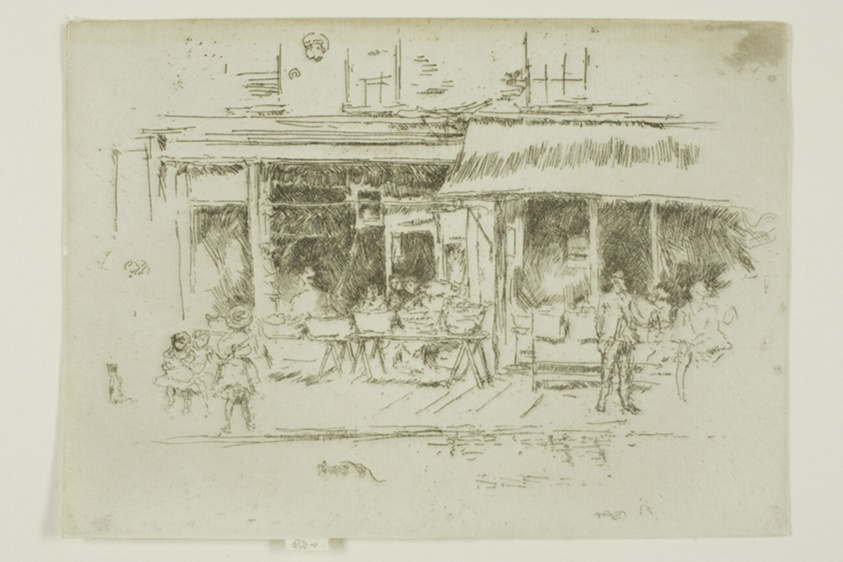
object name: Print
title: Nut Shop, St James's Place, Houndsditch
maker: James McNeill Whistler (American, 1834-1903)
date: 1887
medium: Etching and drypoint with foul biting on off-white laid paper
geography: United States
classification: etching; foul biting; print; prints and drawing; drypoint; paper